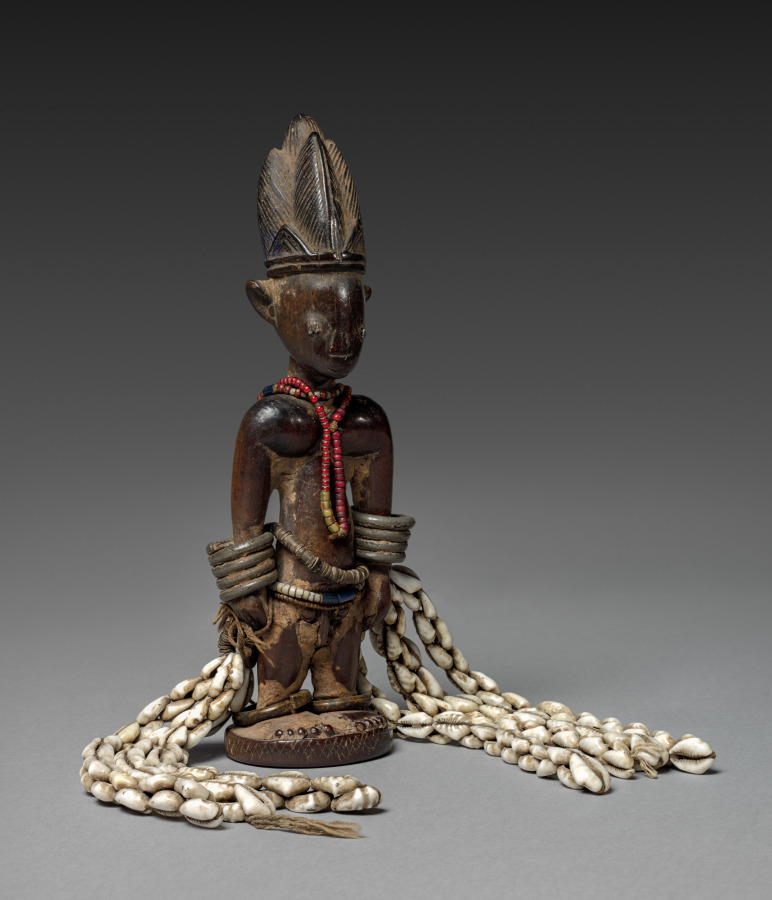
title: Twin Figure (Ère Ìbejì)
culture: Africa, West Africa, Nigeria, Yorùbá-style maker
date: late 1800s–early 1900s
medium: Wood, copper alloy, iron alloy, lead, glass beads, cowrie shells, twine, and pigment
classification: Sculpture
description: Such a figure is carved when a twin dies in infancy and serves as a memorial to the surviving sibling. These twin figures are always carved to look like adult individuals with idealized physical features. Various body adornments suggest the care parents devote to their children, while the erosion of facial features indicates the symbolic washing and feeding of the figure as a means to connect the soul of the deceased to that of the living twin.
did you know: This figure commemorates a twin that has died in infancy.